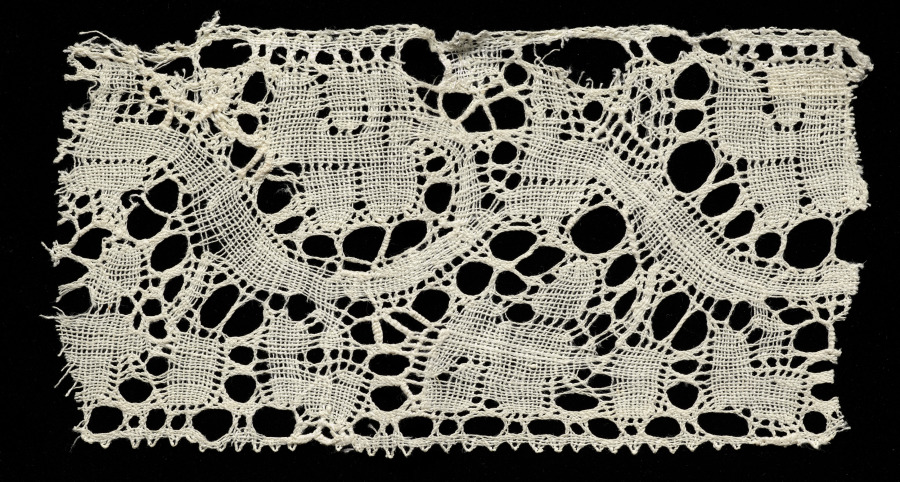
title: Lace Edging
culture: Spain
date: 1700s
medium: Bobbin lace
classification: Lace